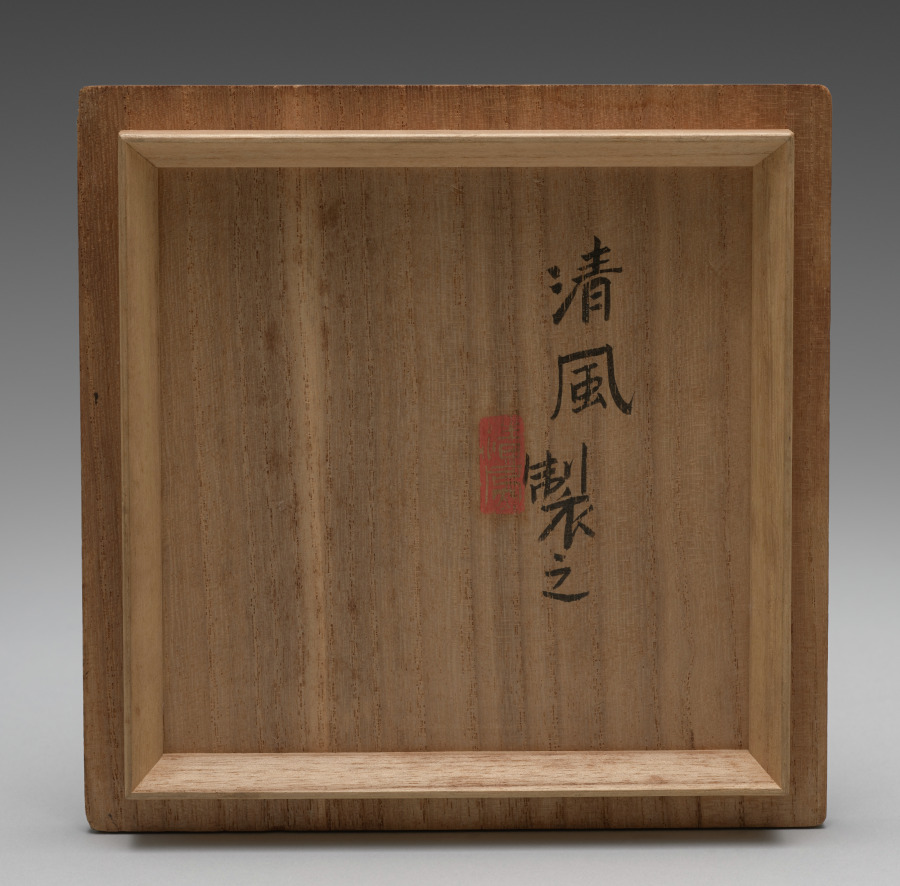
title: Incense Burner with Peony and Cloud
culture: Japan, Meiji period (1868–1912)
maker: Seifū Yohei III (Japanese, 1851–1914)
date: 1914–46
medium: Porcelain with molded and incised design, pale pink glaze, and floral openwork silver lid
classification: Ceramic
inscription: 清風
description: Yohei IV’s incense burner has a scrolling floral pattern of peonies and nyoi staff-head forms around the body and a band of clouds around the collar. These are done in low relief, with incised lines marking the details in the flower petals and leaves. The silver lid has a proliferation of flowers, including lily, peony, and a variety of chrysanthemums. The box lid identifies the subtle pink over an ivory body as “dawn’s light[–glazed] porcelain” (shokōji). After he became an Artist of the Imperial Household, Yohei III created a number of glaze and clay combinations with what would have been considered Japan-focused names to be in alignment with his position as an artist representing the nation. Among them was a glaze called “dawn’s light pale [pink] color” (akebonoiro tansai), which he invented in 1895. It is possible that this incense burner is an example with this glaze, despite the slightly different name given on the box. While the name alludes to the Land of the Rising Sun, an epithet for Japan, the burner’s motifs remain very much drawn from the Chinese repertoire.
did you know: Seifū Yohei IV’s incense burner has a pale pink glaze named “dawn’s light.”